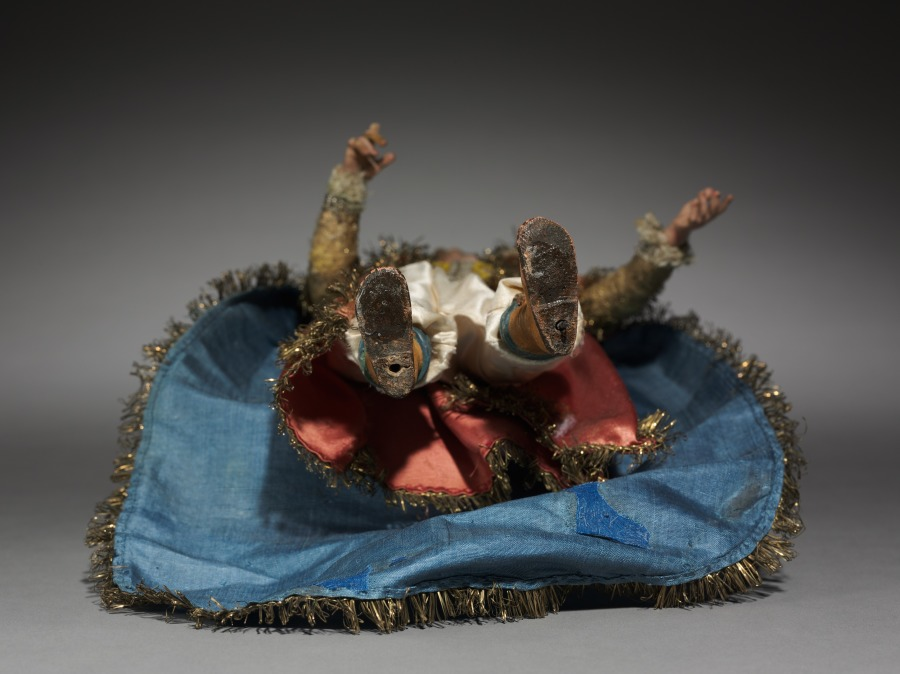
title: Figure from a Crèche: Youthful Magus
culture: Italy, Naples, late 18th-early 19th century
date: 1780–1830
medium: painted wood and terracotta with various textiles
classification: Sculpture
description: The practice of creating scenes of the Nativity for the home dates from the early 1700s in Italy, where people began to set up doll-like figures of about a foot or less in height. The custom was particularly popular in Naples around 1800, where crèche scenes (crèche means cradle, or crib) included many figures, whose heads and hands of painted terracotta, stuffed cloth bodies, and clothing adapted from contemporary local costumes gave them an amazingly realistic character. Representations of the birth of Jesus can be traced to the first few centuries of Christianity. Both living creatures and sculptural depictions of them were used from early times. By the late middle ages it was customary to create life-size figures of wood or stone, naturalistically painted, to represent the characters who participated in the events of Jesus's early life. These sculptures were then arranged in scenes illustrating one or both of the most important of these events, the Adoration of the Shepherds and the Adoration of the Magi-the three kings from the East who came to pay homage to the Christ child. Used in churches, these large figures were especially popular in Italy, Central Europe, Spain, and Portugal.